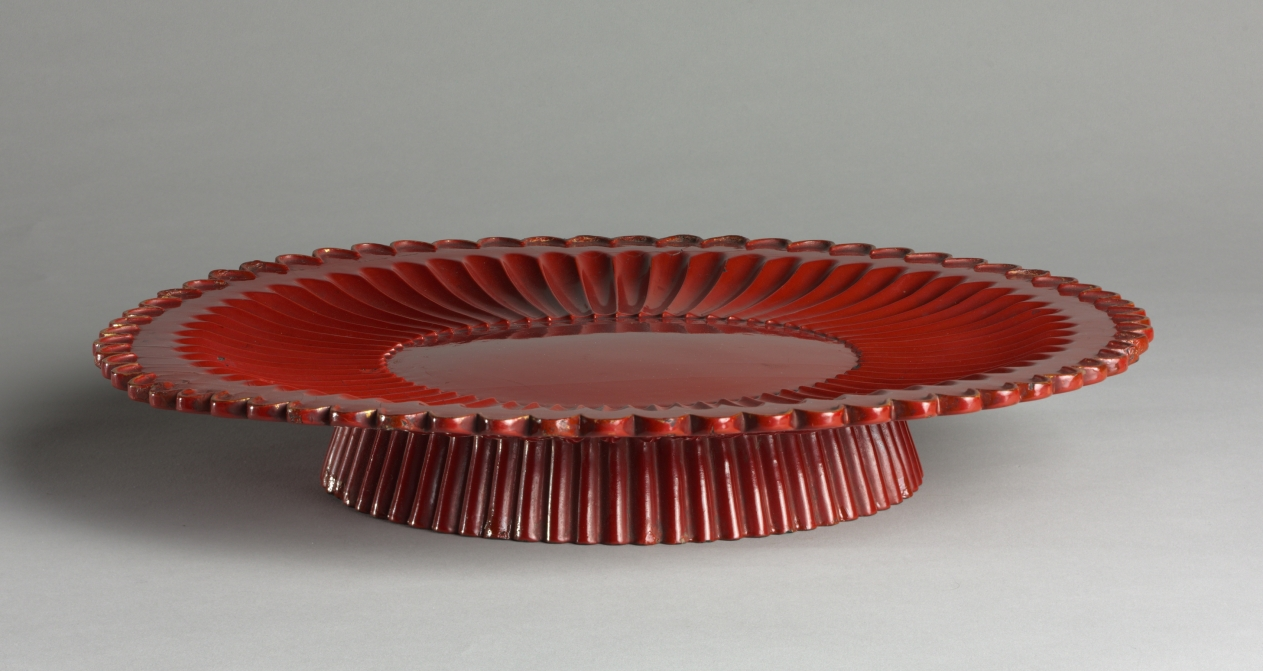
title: Fluted Tray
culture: China, Yuan dynasty (1271-1368) - Ming dynasty (1368-1644)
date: 1300s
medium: red lacquer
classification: Lacquer